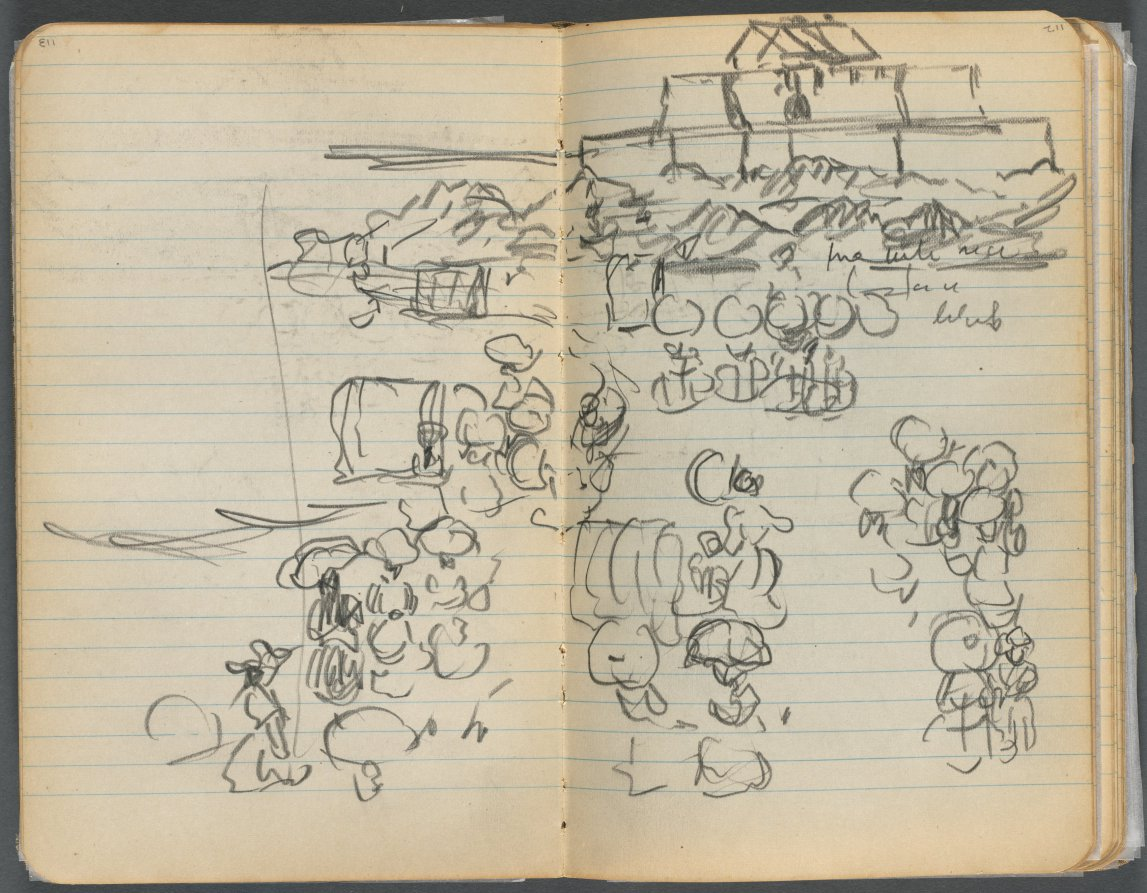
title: Sketchbook, page 112 & 113: Beach View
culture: America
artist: Maurice Prendergast (American, born Newfoundland [now Canada], 1858–1924)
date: 1905–10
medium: graphite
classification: Bound Volume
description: This sketchbook contains 69 pages of drawings, a diary largely devoted to the state of the artist's health, and a three-page discourse on the nature of genius and ideas.